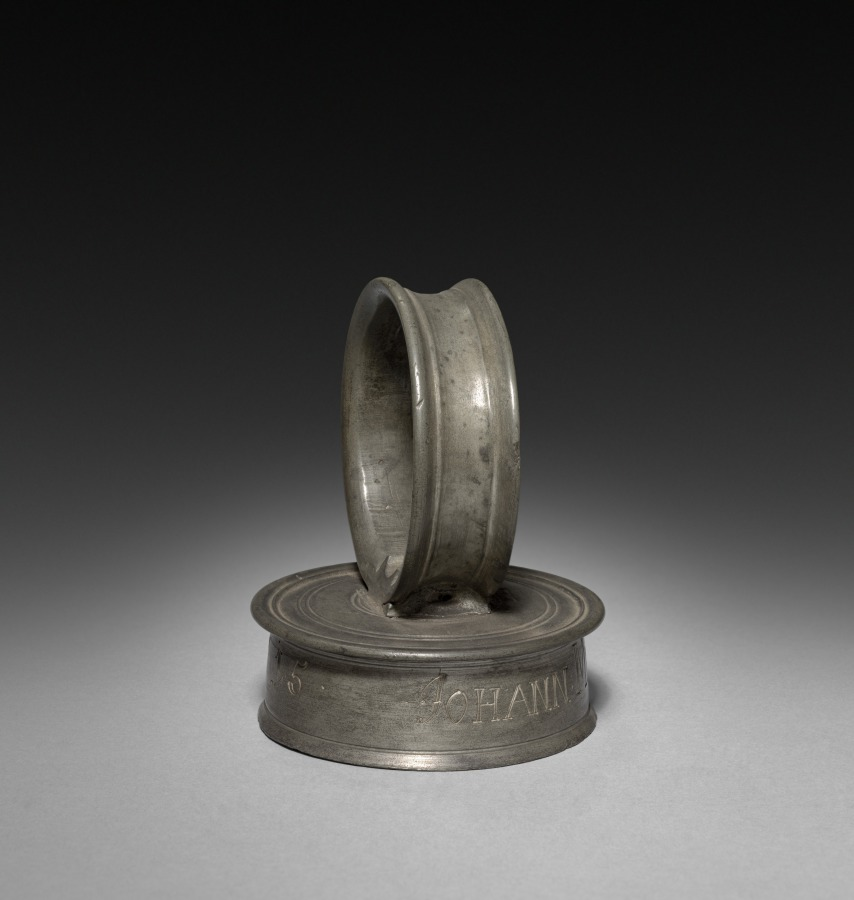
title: Cannister (lid)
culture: Germany, 18th century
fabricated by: Johann Melchoir Warner (German)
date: 1715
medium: pewter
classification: Metalwork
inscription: inscribed around the neck: "Johann Melchoir Warner, 1715."